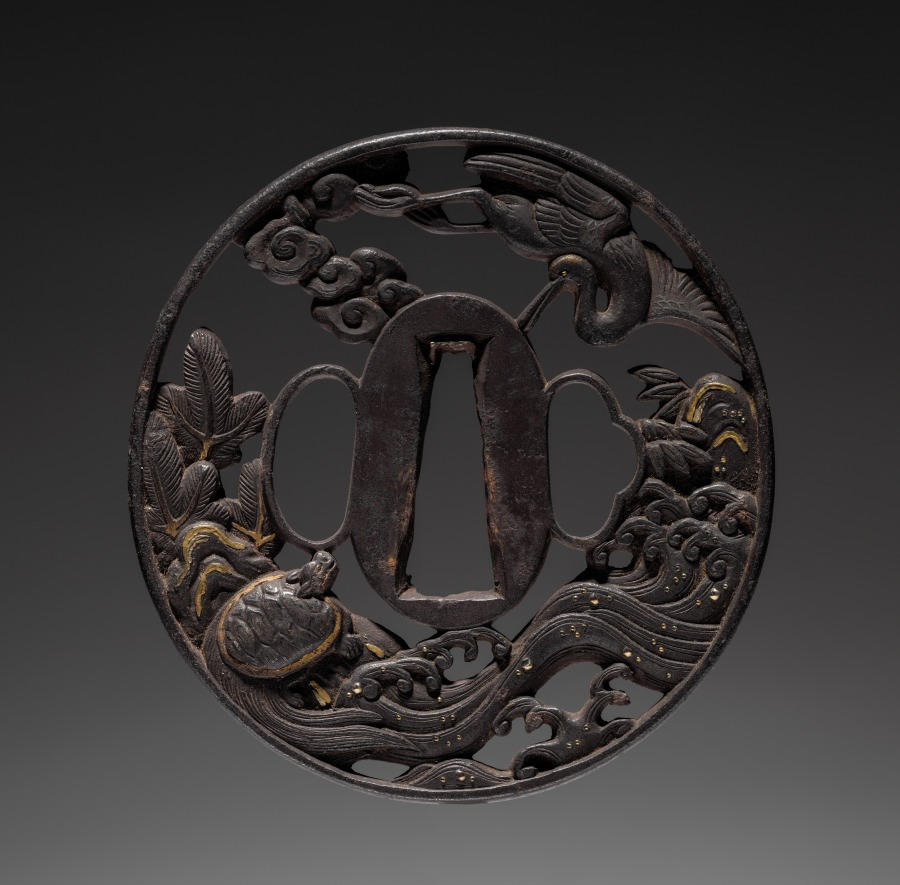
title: Sword Guard (Tsuba) with Crane and Tortoise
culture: Japan, possibly Edo period (1615-1868)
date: c. 1615–1868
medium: iron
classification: Arms and Armor